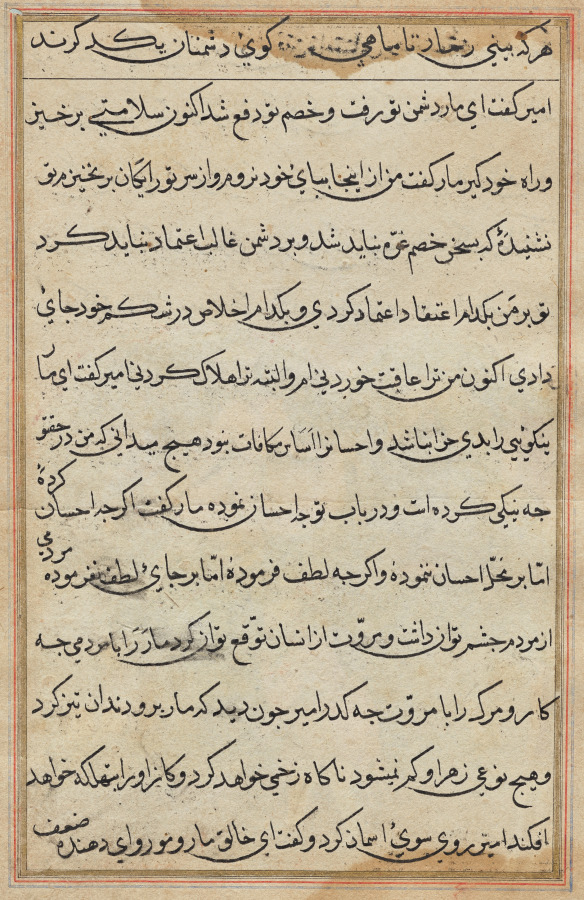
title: Page from Tales of a Parrot (Tuti-nama): text page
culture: Mughal India, court of Akbar (reigned 1556–1605)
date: c. 1560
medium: gum tempera, ink, and gold on paper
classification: Painting